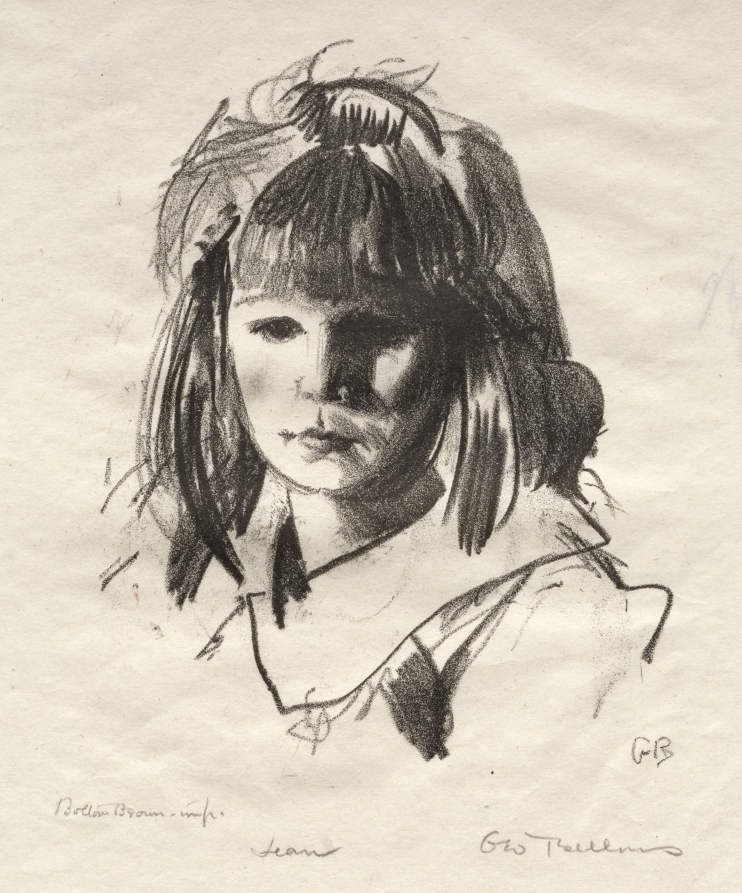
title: Jean 1921, First Stone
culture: America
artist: George Bellows (American, 1882–1925)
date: 1921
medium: lithograph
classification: Print